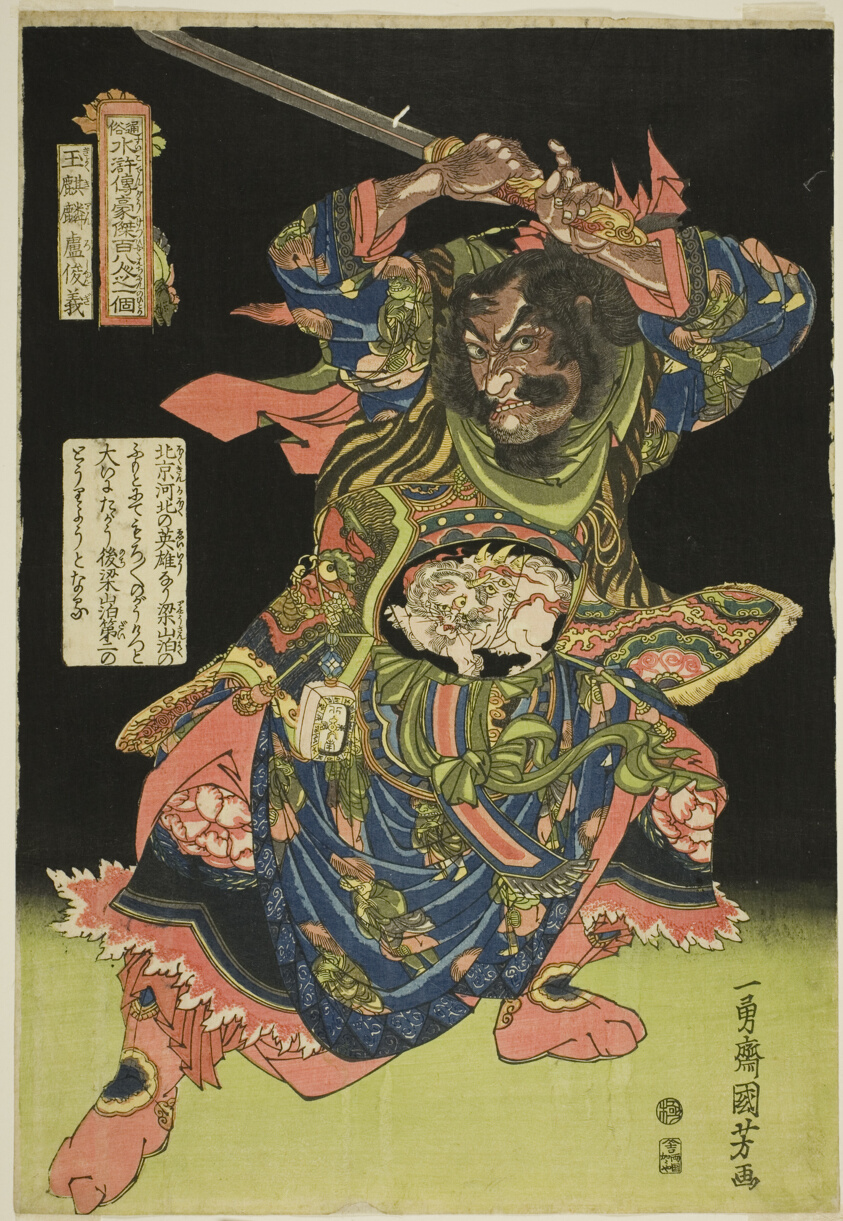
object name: Print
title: Lu Junyi (Gyokukirin Roshungi), from the series "One Hundred and Eight Heroes of the Popular Water Margin (Tsuzoku Suikoden goketsu hyakuhachinin no hitori)"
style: Japanese (culture or style)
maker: Utagawa Kuniyoshi (Japanese, 1787-1861)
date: c. 1827/30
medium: Color woodblock print; oban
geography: Japan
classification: woodblock print; print; asian art